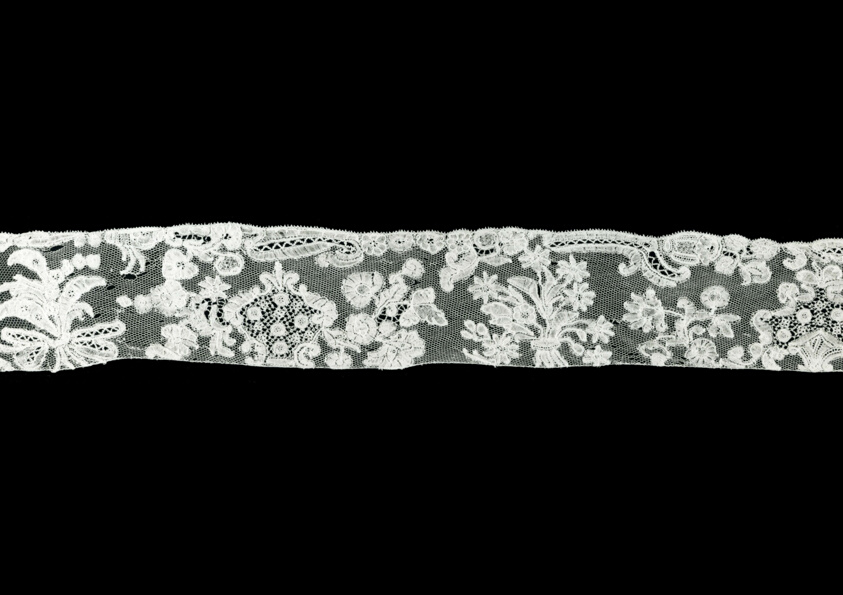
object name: Textile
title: Border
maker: Flanders, Brussels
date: 1755/65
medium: Linen, bobbin part lace of a type known as "Brussels" with a Droschel mesh ground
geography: Brussels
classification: textile; lace - bobbin